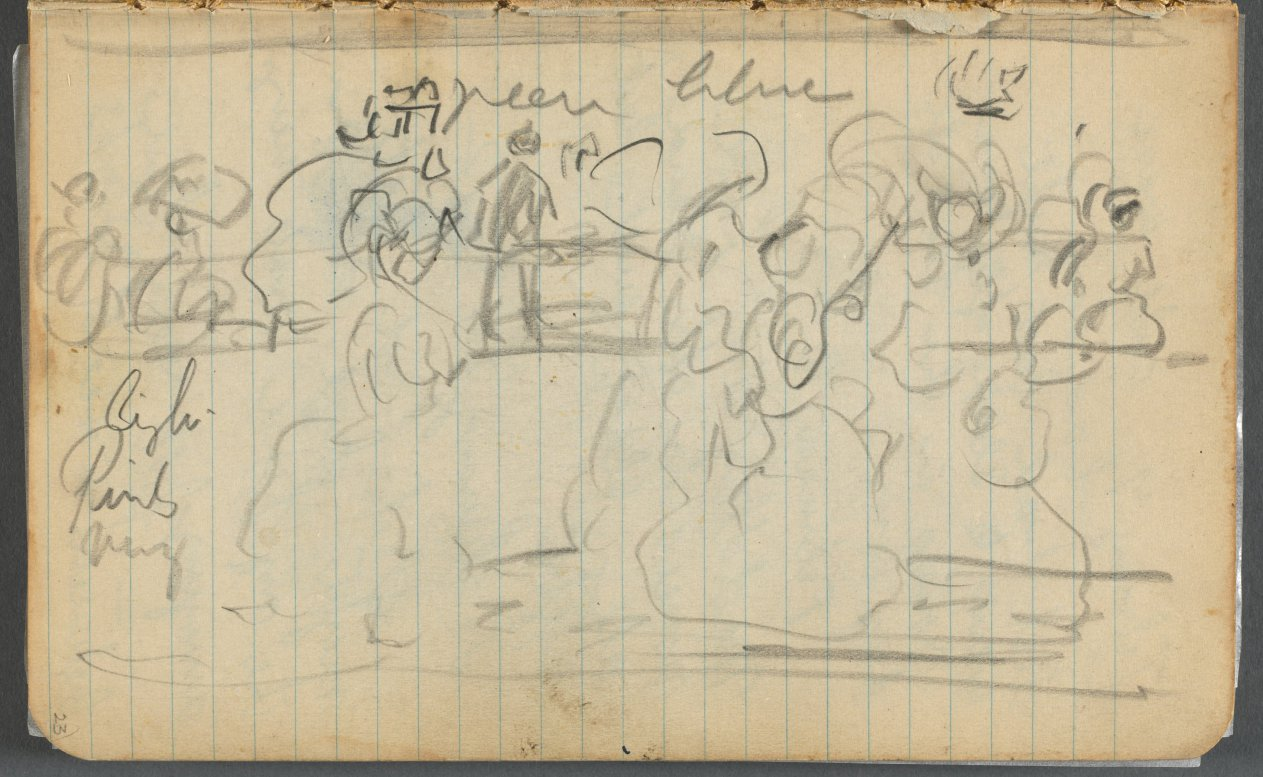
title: Sketchbook, page 023:Figures in Landscape with Notes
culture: America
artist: Maurice Prendergast (American, born Newfoundland [now Canada], 1858–1924)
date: 1905–10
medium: graphite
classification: Bound Volume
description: This sketchbook contains 69 pages of drawings, a diary largely devoted to the state of the artist's health, and a three-page discourse on the nature of genius and ideas.